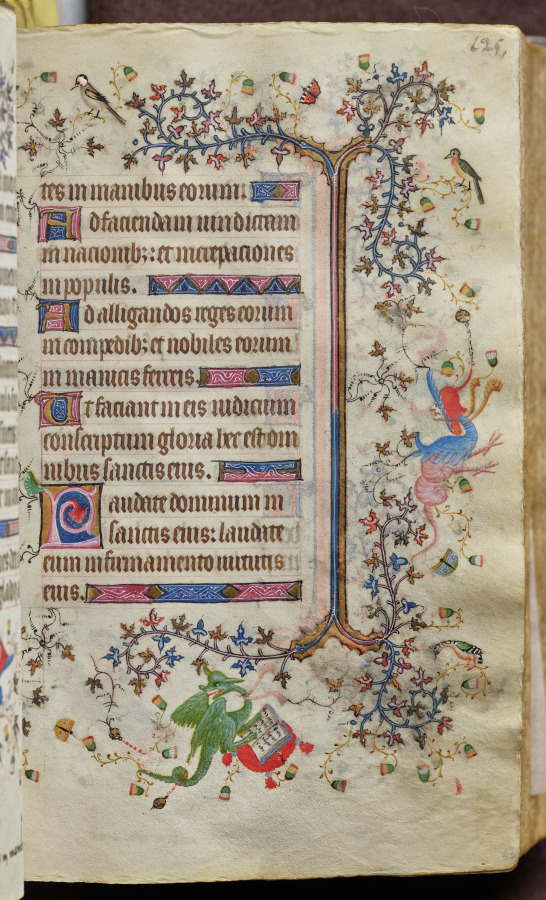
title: Hours of Charles the Noble, King of Navarre (1361-1425): fol. 63r, Text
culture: France, Paris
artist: Master of the Brussels Initials and Associates (French)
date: c. 1405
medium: ink, tempera, and gold on vellum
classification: Bound Volume